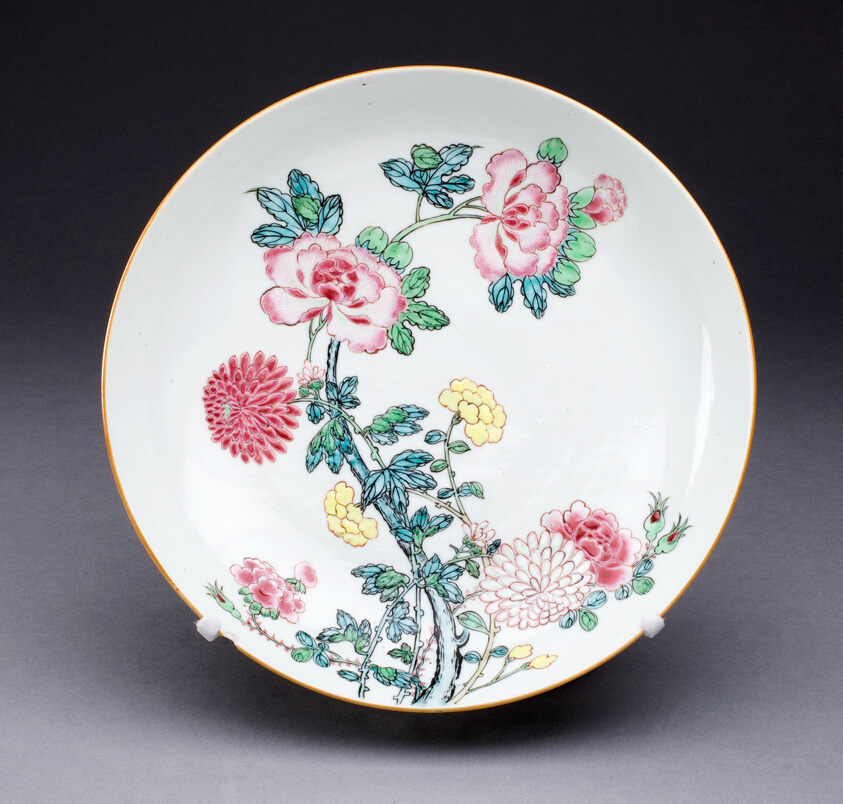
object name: Ceramics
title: Dish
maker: China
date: c. 1725, Qing Dynasty (1644–1911), Yongzhen period (1723–1735)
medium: Hard-paste porcelain and polychrome enamels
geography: China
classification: dish (vessel); ceramics